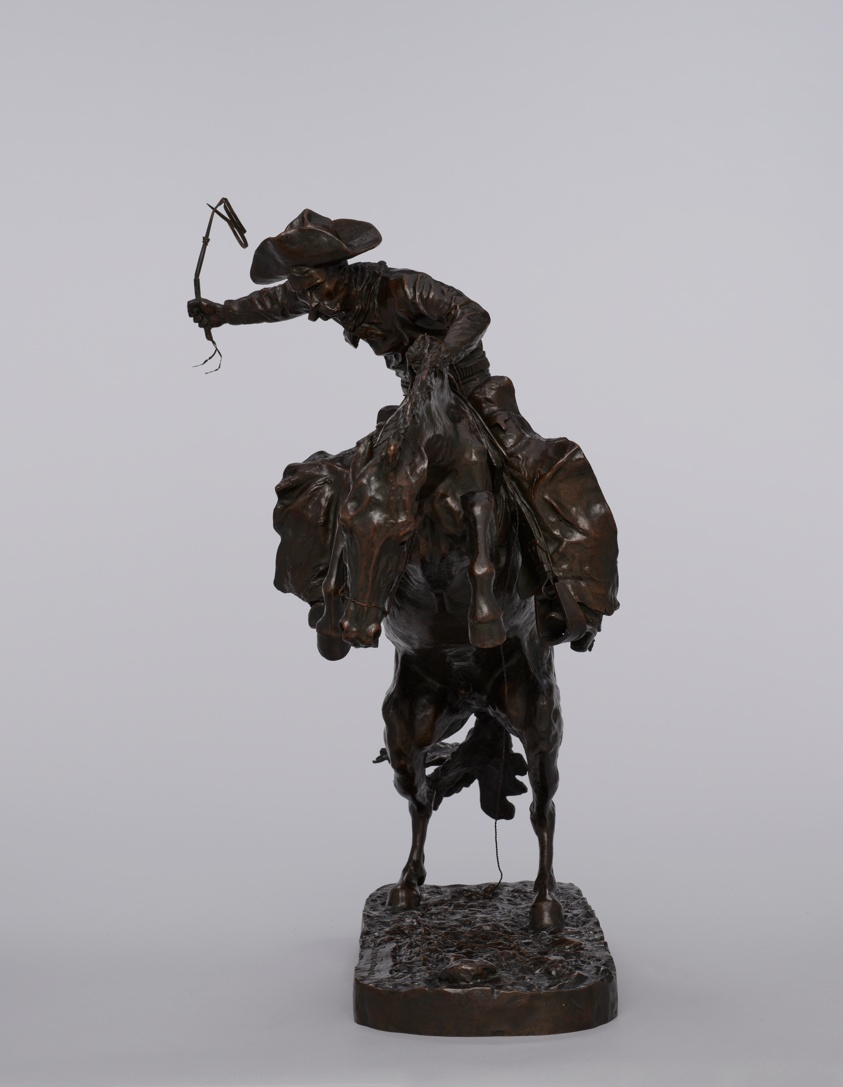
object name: Sculpture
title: The Bronco Buster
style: 19th century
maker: Frederic Remington (American, 1861–1909); Cast by Henry-Bonnard Bronze Co. (American, 19th century)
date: Modeled 1895, cast 1899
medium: Bronze with brown patina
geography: United States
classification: sculpture; american arts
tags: animals, rodeos, cowboys, horses, horseback riding, people, portraits